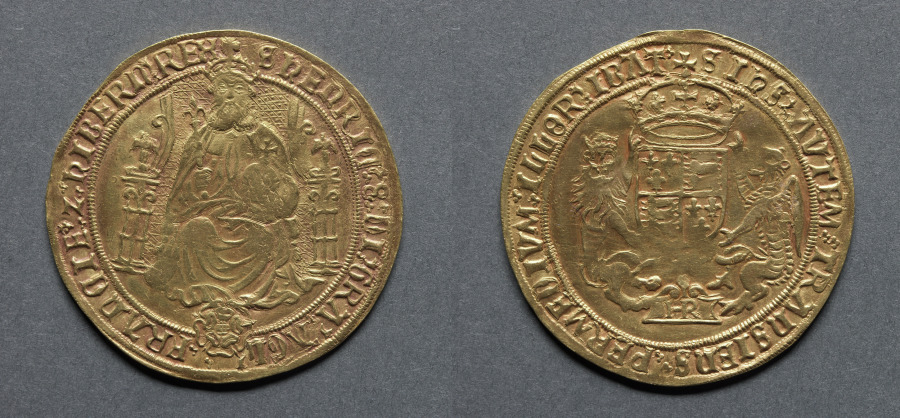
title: Sovereign: Henry VIII (obverse); Crowned Shield of Arms (reverse)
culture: England, Henry VIII, 1509-1547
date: 1544–47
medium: gold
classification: Coins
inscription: HENRIC. 8. DI. GRA. AGL FRNCIE Z. HIBERNIE REX.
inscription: IHS. AVTEM TRANSIENS PER MEDIVM ILLORVM IBAT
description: This is an example of the late, debased, third coinage of Henry VIII. Knowing how coinage had been debased in the past, Henry VIII did so again for his own personal benefit. He not only debased the gold coinage but the silver as well. This coin was struck at Southwark mint. The Southwark mint was in Suffolk Place, Southwark being immediately south of London Bridge. The mint was opened in June 1545, along with those of Canterbury, Durham House, Bristol, and York.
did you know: This coin was struck during the end of Henry VIII's reign which ended in 1547 and lasted for 38 years.